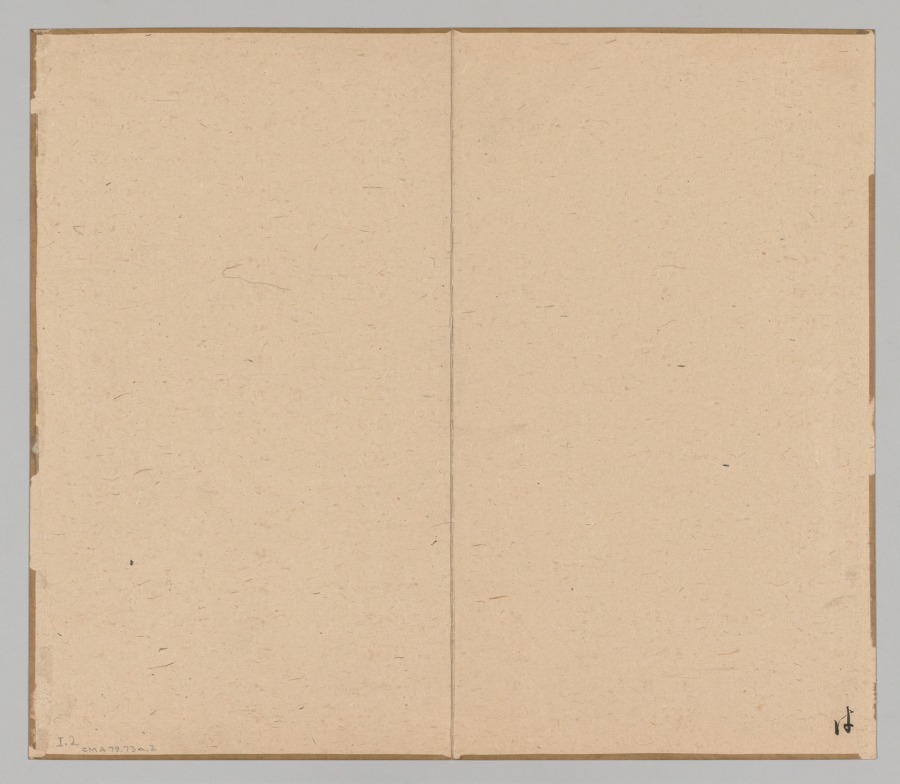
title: Reverberations of Taiga, Volume 1 (leaf 2)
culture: Japan, Edo period (1615–1868)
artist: Aoki Shukuya (Japanese, d. 1802)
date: mid- to late 1700s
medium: double-leaf from a pair of albums; ink and light color on paper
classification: Portfolio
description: Traditionally, young painters in Japan began their studies with an established master-painter. The master's compositions invariably became models that the apprentice copied to learn various ink and brush techniques. Shukuya was a pupil of the famous Kyoto artist Ikeno Taiga, whose style is reflected in these sketches of rocks, trees, and mountains.